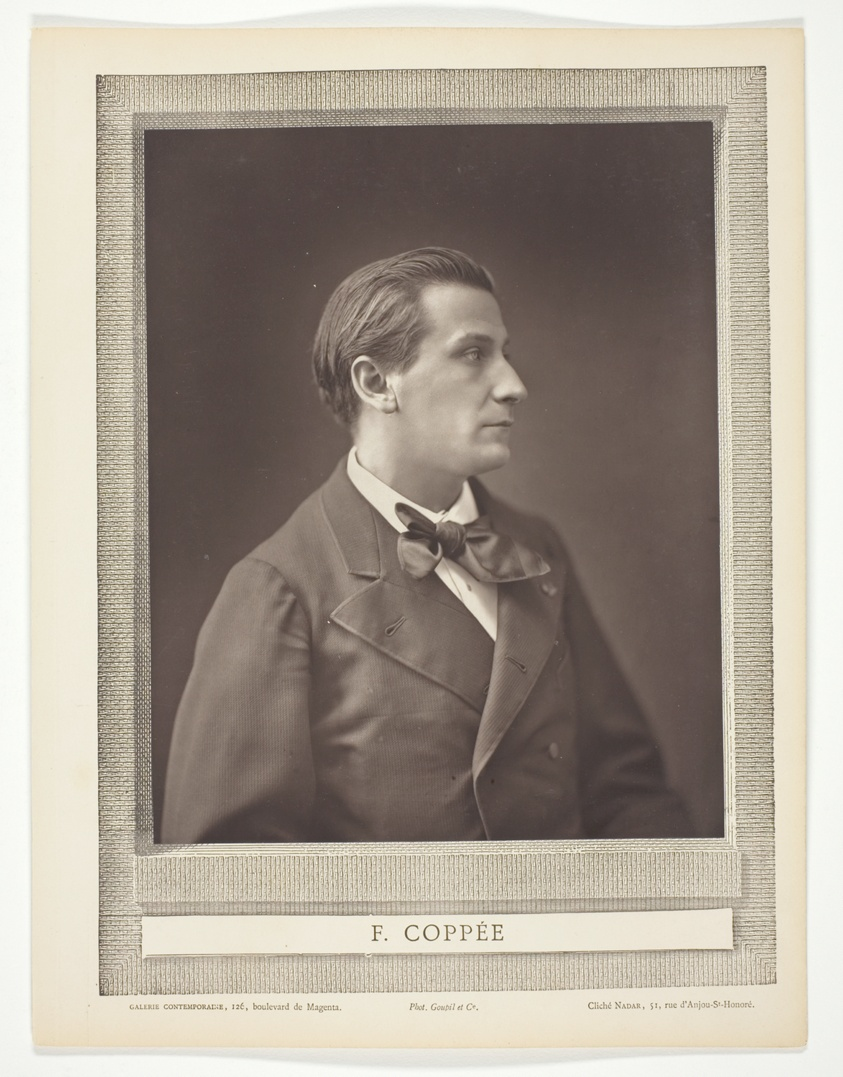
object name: Photograph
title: François Coppée (French poet and novelist, 1842-1908)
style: 19th century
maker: Nadar (Gaspard Félix Tournachon) (French, 1820–1910)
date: c. 1876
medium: Woodburytype, from the periodical “Galerie Contemporaine Littéraire, Artistique” (1877), volume 2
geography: France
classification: woodburytype; photomechanical process; photography; photograph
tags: Collected by Hugh Edwards, Contemporaine Littéraire